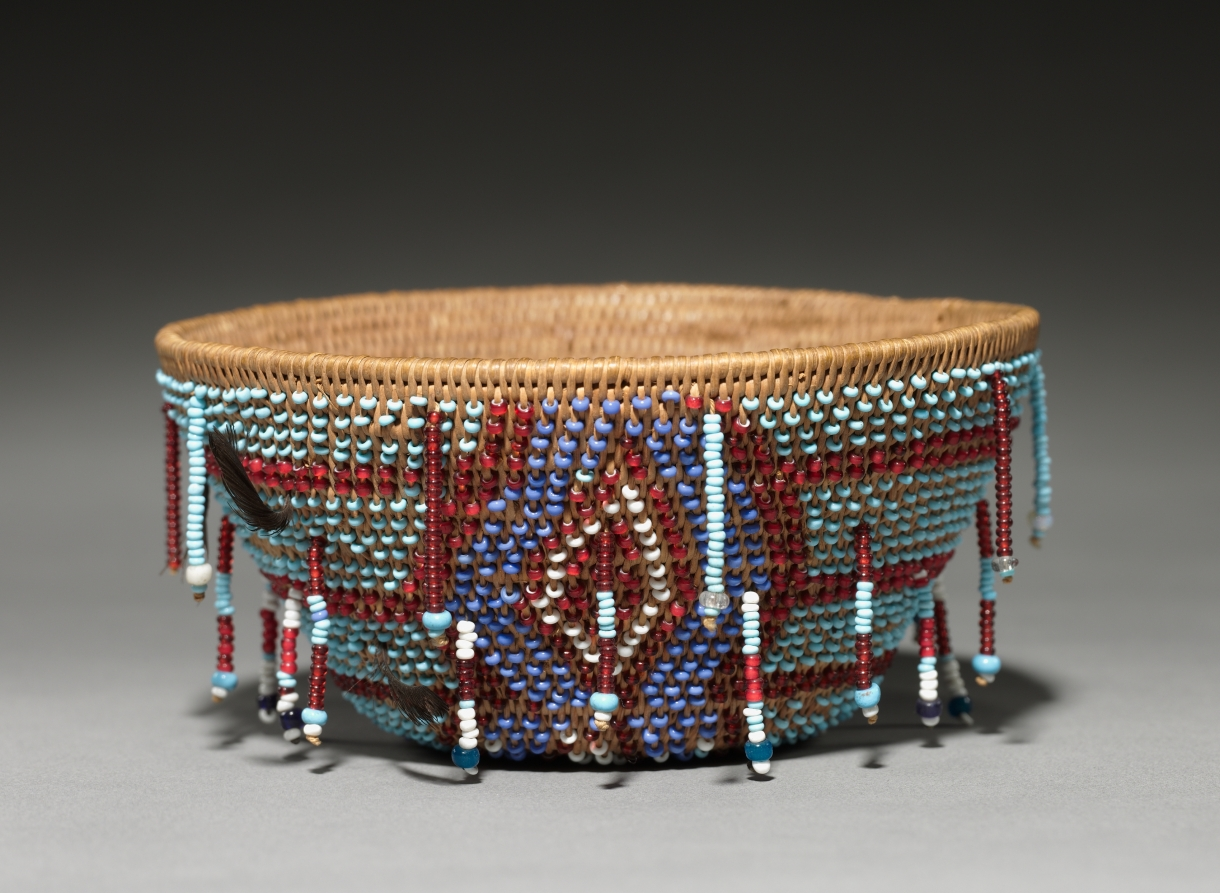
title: Conical Beaded Basket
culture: California, Wappo, Alexander Valley, Late 19th- Early 20th century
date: c. 1875–1925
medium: glass beads and feather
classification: Basketry